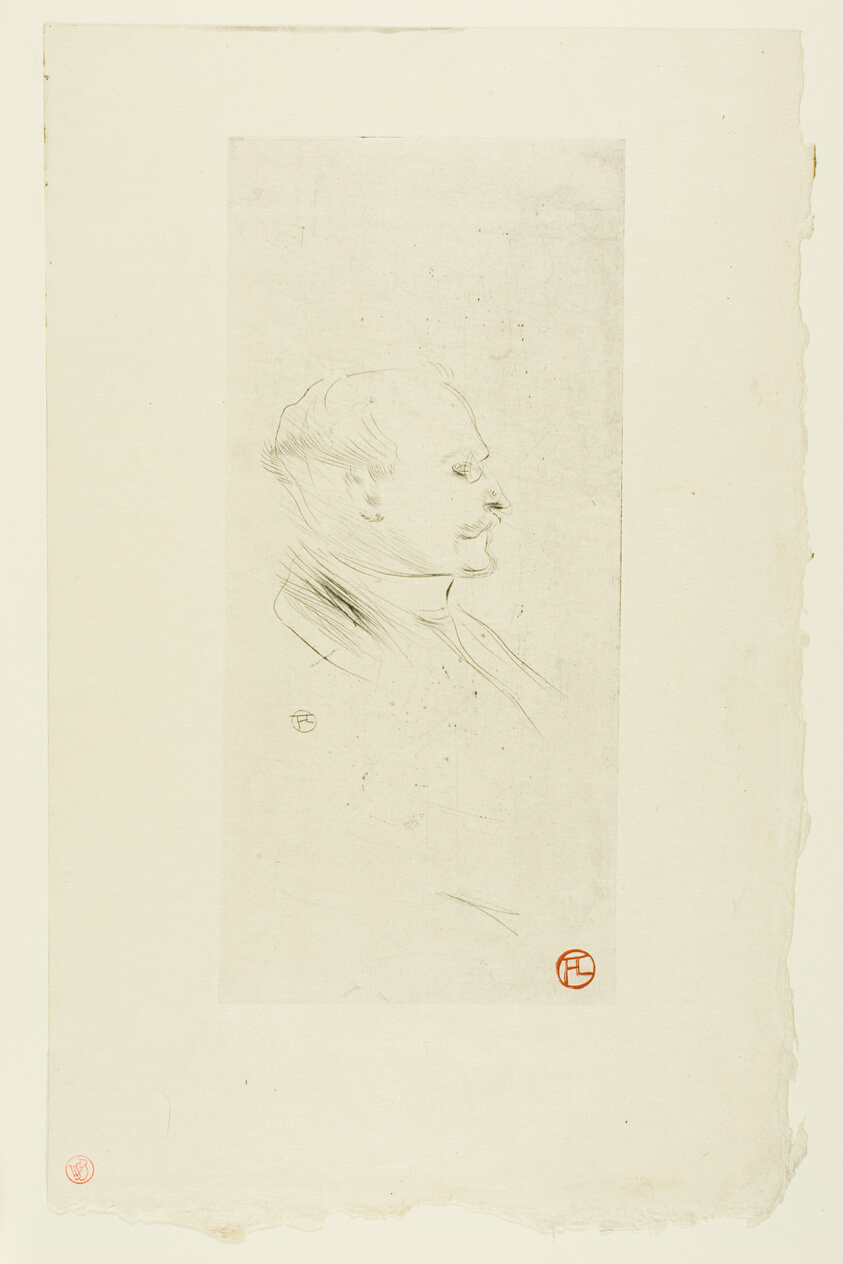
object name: Print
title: W. H. B. Sands, Publisher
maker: Henri de Toulouse-Lautrec (French, 1864-1901)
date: 1898, published 1911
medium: Drypoint from a zinc plate on cream laid Japanese paper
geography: France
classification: drypoint; print; prints and drawing